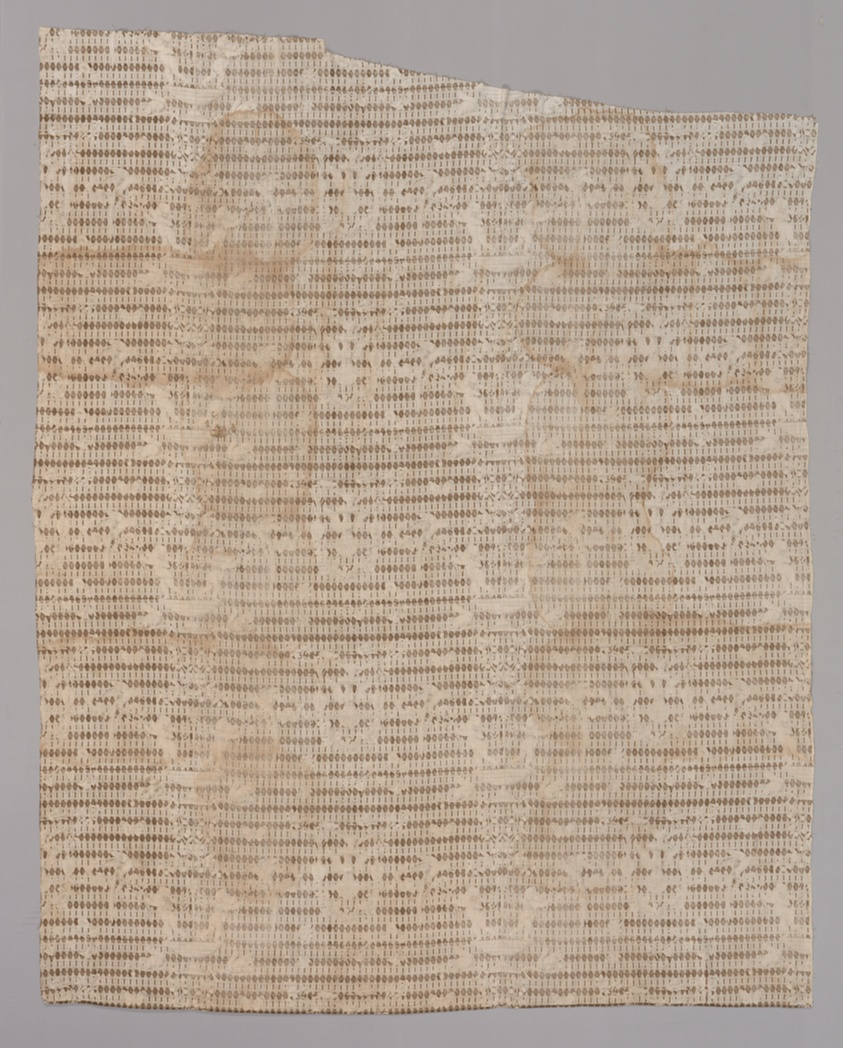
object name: Textile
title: “Birds and Squirrels” Furnishing Fabric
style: Neoclassicism, jouy-en-Josas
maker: Designed by Jean Baptiste Huet (French, 1745–1811); France, Jouy-en-Josas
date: 1806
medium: Cotton; roller printed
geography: France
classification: printed textile; textile; furnishing textile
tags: birds, animals